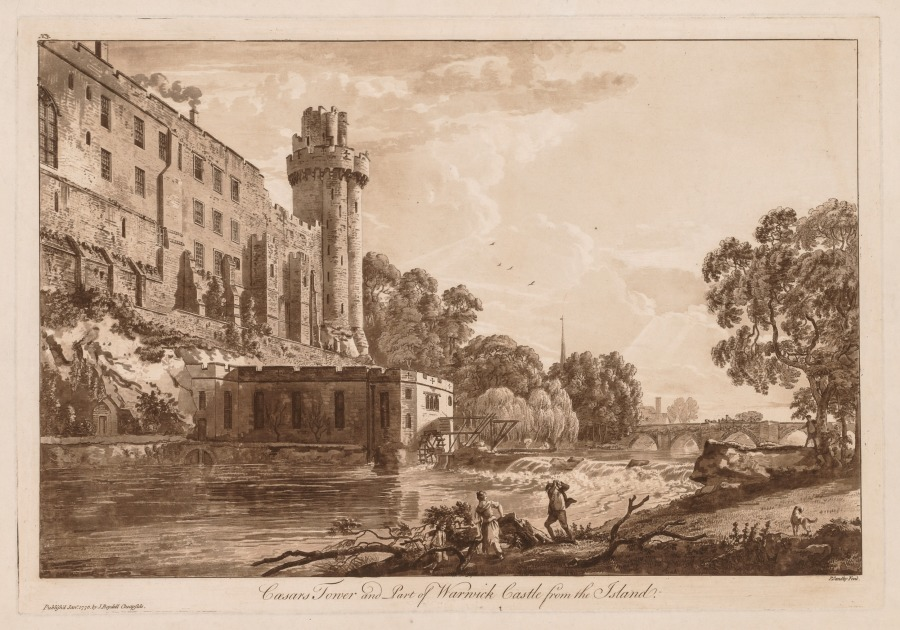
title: Views of Warwick Castle: Caesar's ower and Part of Warwick Castle from the Island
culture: England, 18th century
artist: Paul Sandby (British, 1731–1809)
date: 1776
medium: etching and aquatint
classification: Print